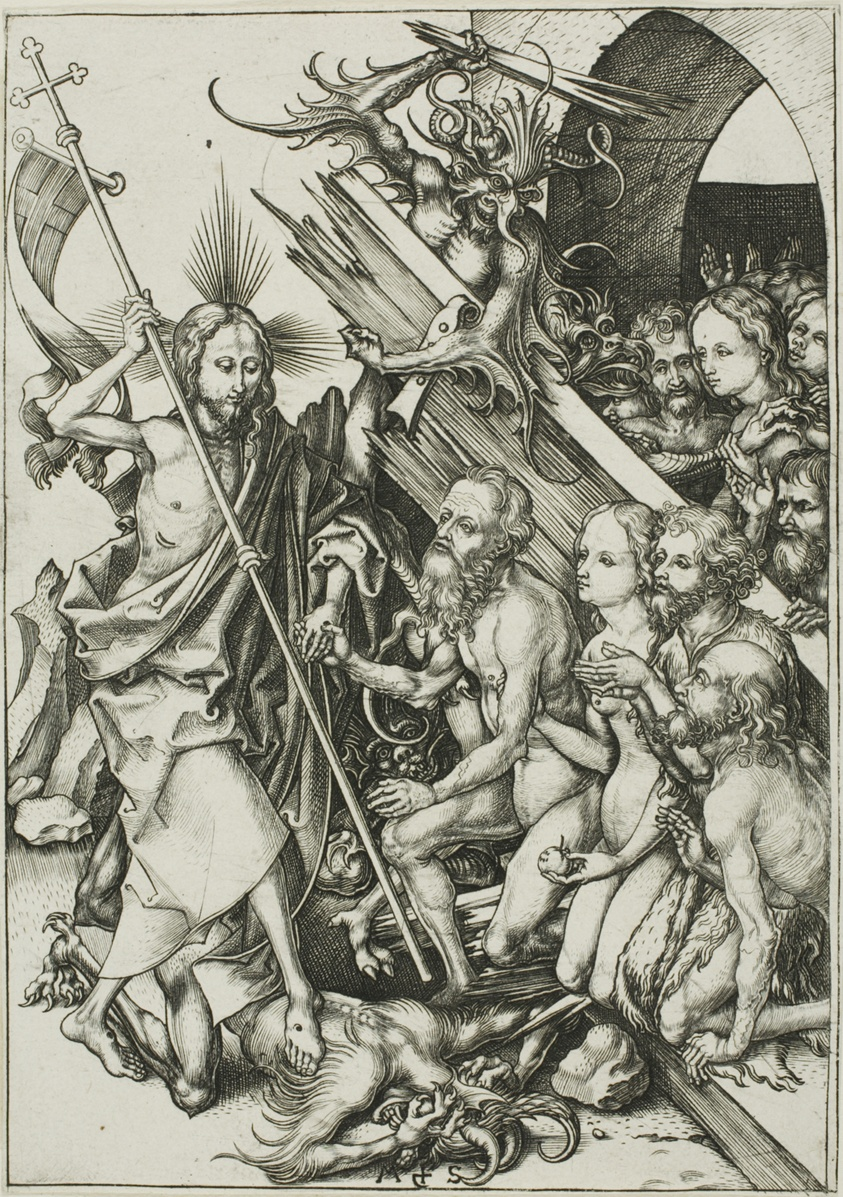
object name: Print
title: Christ in Limbo, from The Passion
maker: Martin Schongauer (German, c. 1430/50-1491)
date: c. 1480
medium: Engraving in black on ivory laid paper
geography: Germany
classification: engraving; print; prints and drawing